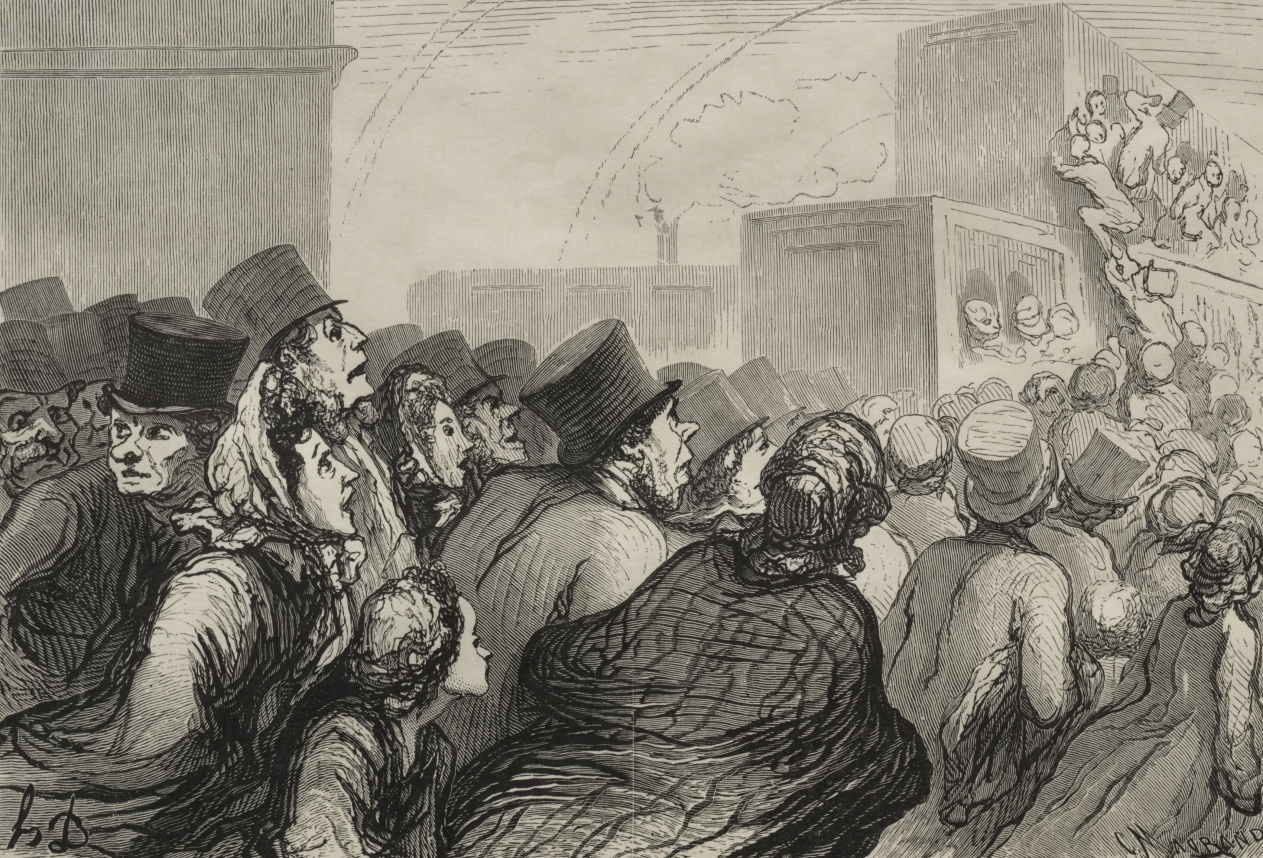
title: The Railway: The Sunday Excursion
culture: France, 19th century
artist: Honoré Daumier (French, 1808–1879)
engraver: Charles Maurand (French, 1824–1904)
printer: François Louis Schmied (Swiss, 1873–1941)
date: 1862, printed 1920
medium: wood engraving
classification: Print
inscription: Lower margin, in pencil: 68/75 ; red stamp: FLS